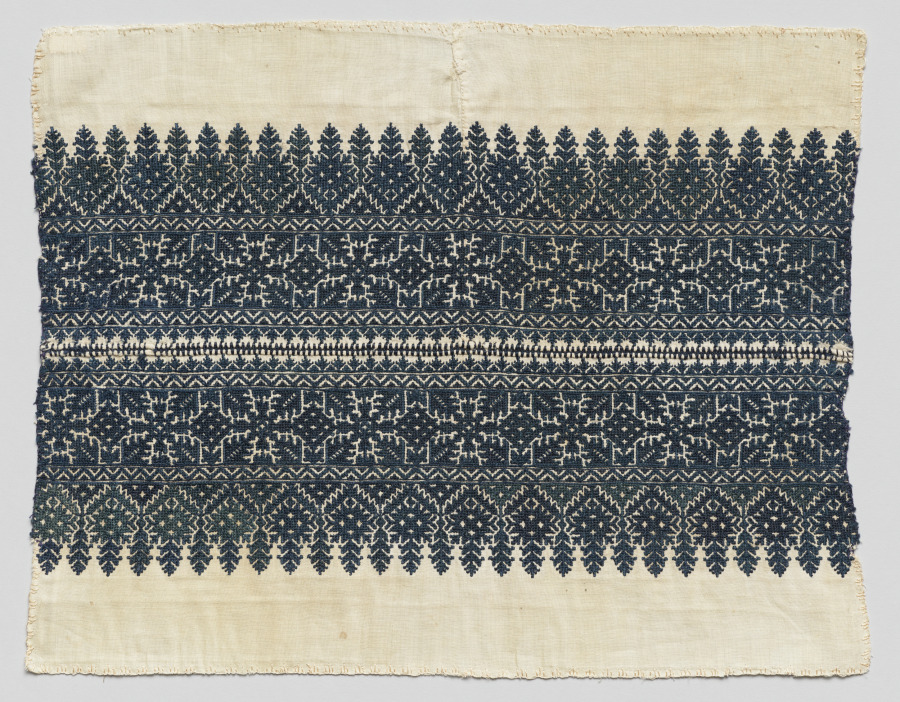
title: Fragment of a furnishing textile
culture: Africa, North Africa, Morocco, Fes, Moroccan embroiderer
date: early 1900s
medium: Cotton, silk, dye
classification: Embroidery